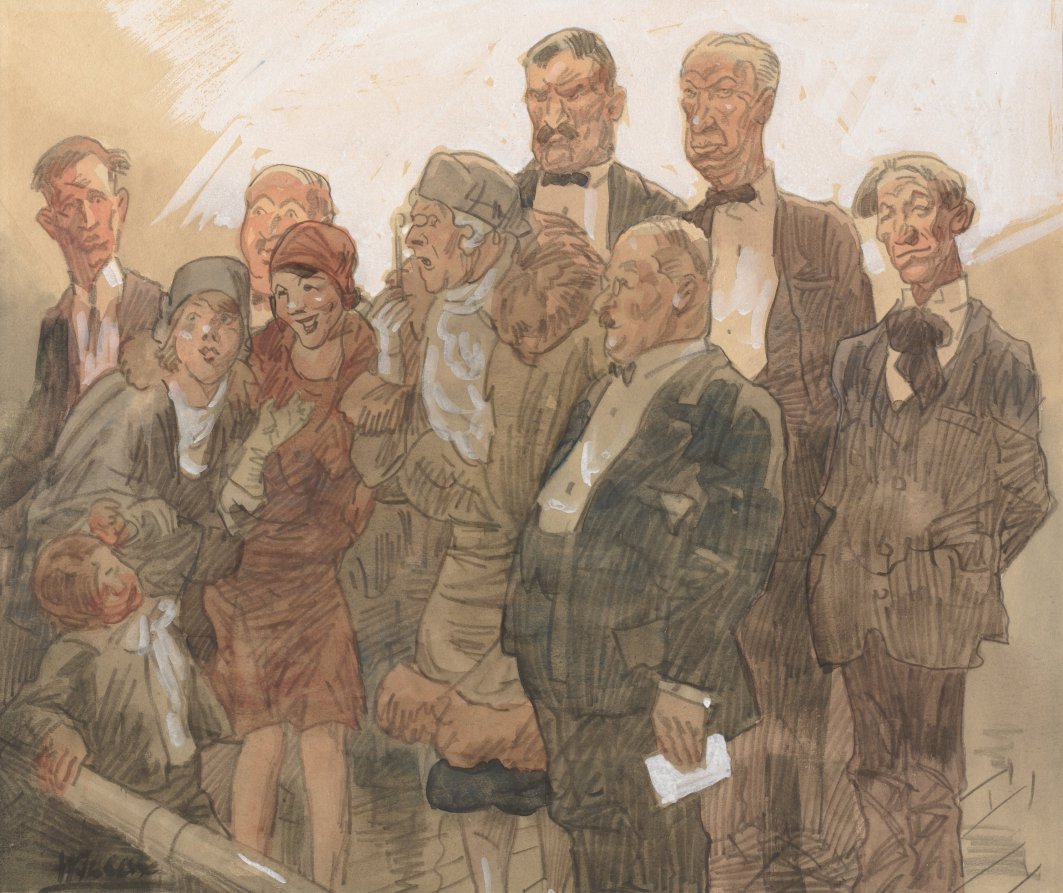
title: History of a Picture No. 2: The Public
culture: America, Ohio, Cleveland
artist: Frank Wilcox (American, 1887–1964)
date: c, 1929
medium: pencil and wash heightened with white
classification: Drawing